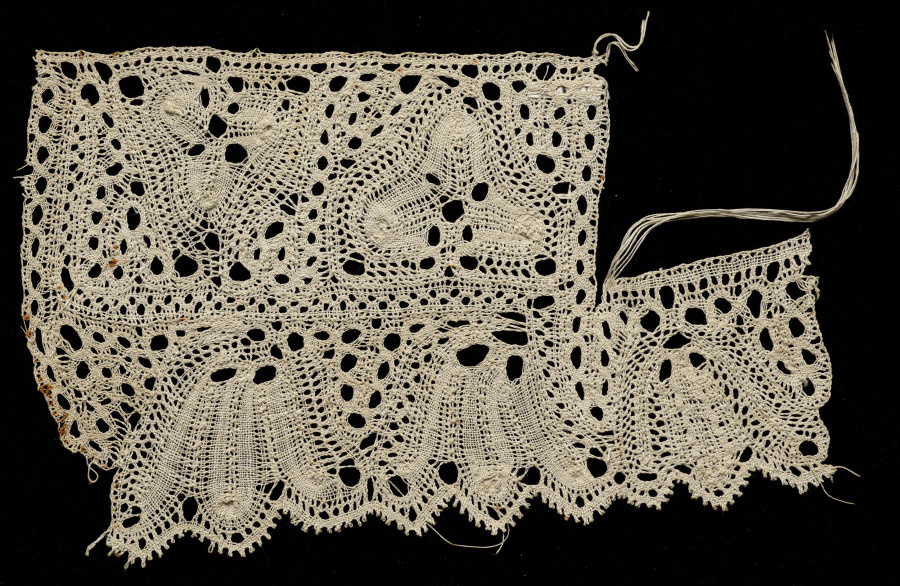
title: Lace Edging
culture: Spain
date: 1800s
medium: Bobbin lace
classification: Lace